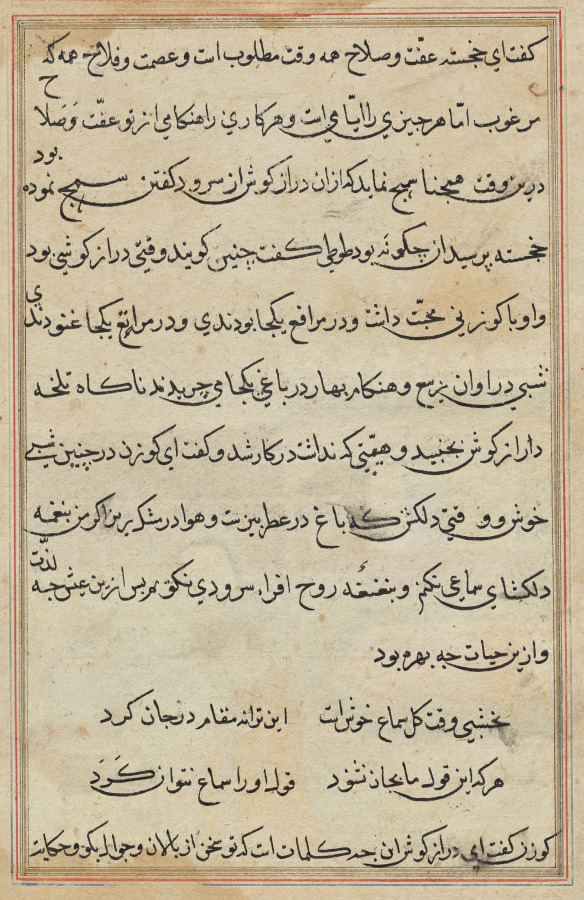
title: Page from Tales of a Parrot (Tuti-nama): text page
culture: Mughal India, court of Akbar (reigned 1556–1605)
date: c. 1560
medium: gum tempera, ink, and gold on paper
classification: Painting